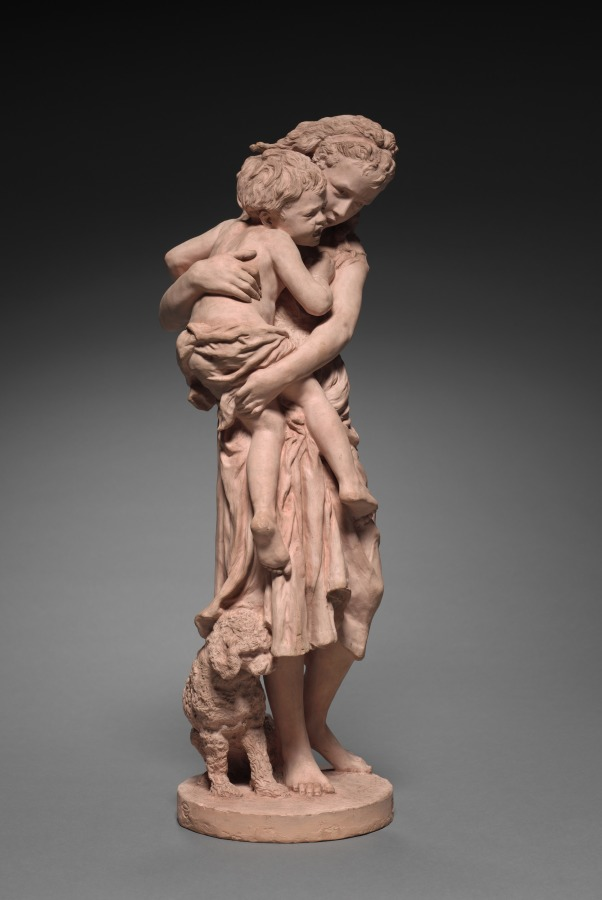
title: Brother and Sister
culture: France, 19th century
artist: Jean-Baptiste Carpeaux (French, 1827–1875)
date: 1875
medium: terracotta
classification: Sculpture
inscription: Signed "JBT" Carpeaux/1875" upper surface of base.